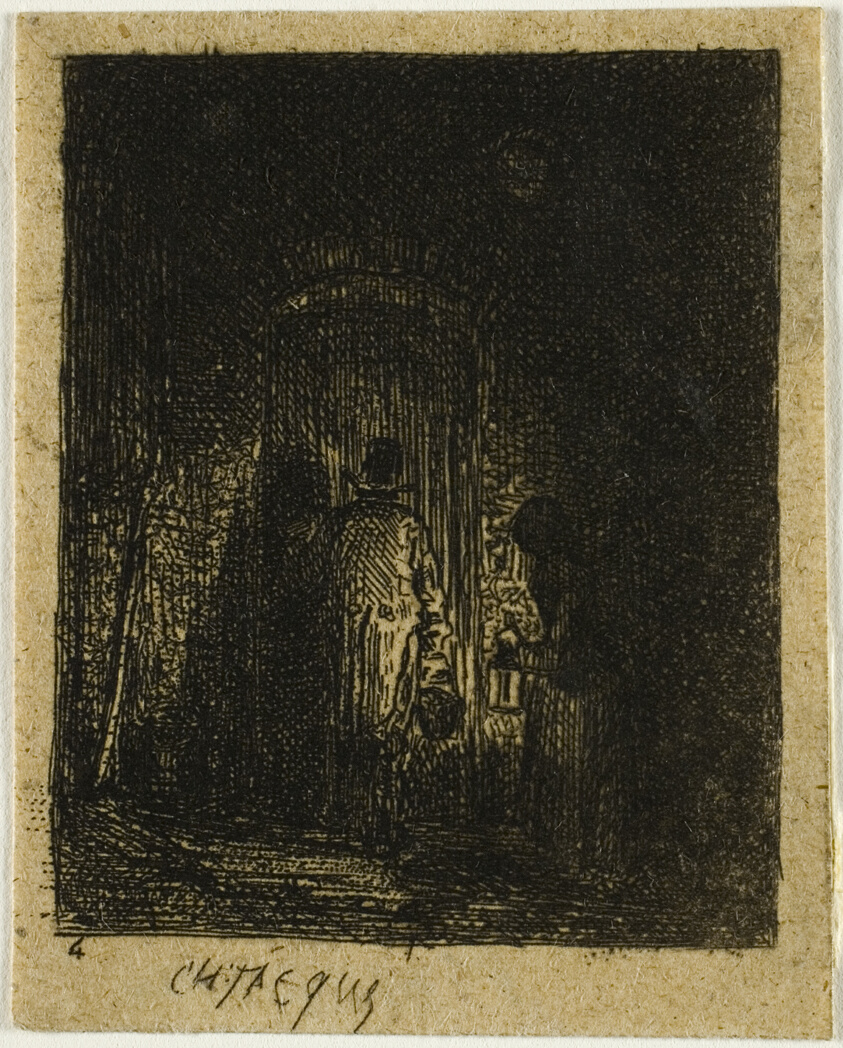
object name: Print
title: Man and Woman with Lanterns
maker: Charles Émile Jacque (French, 1813-1894)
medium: Etching on buff chine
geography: France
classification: etching; print; prints and drawing